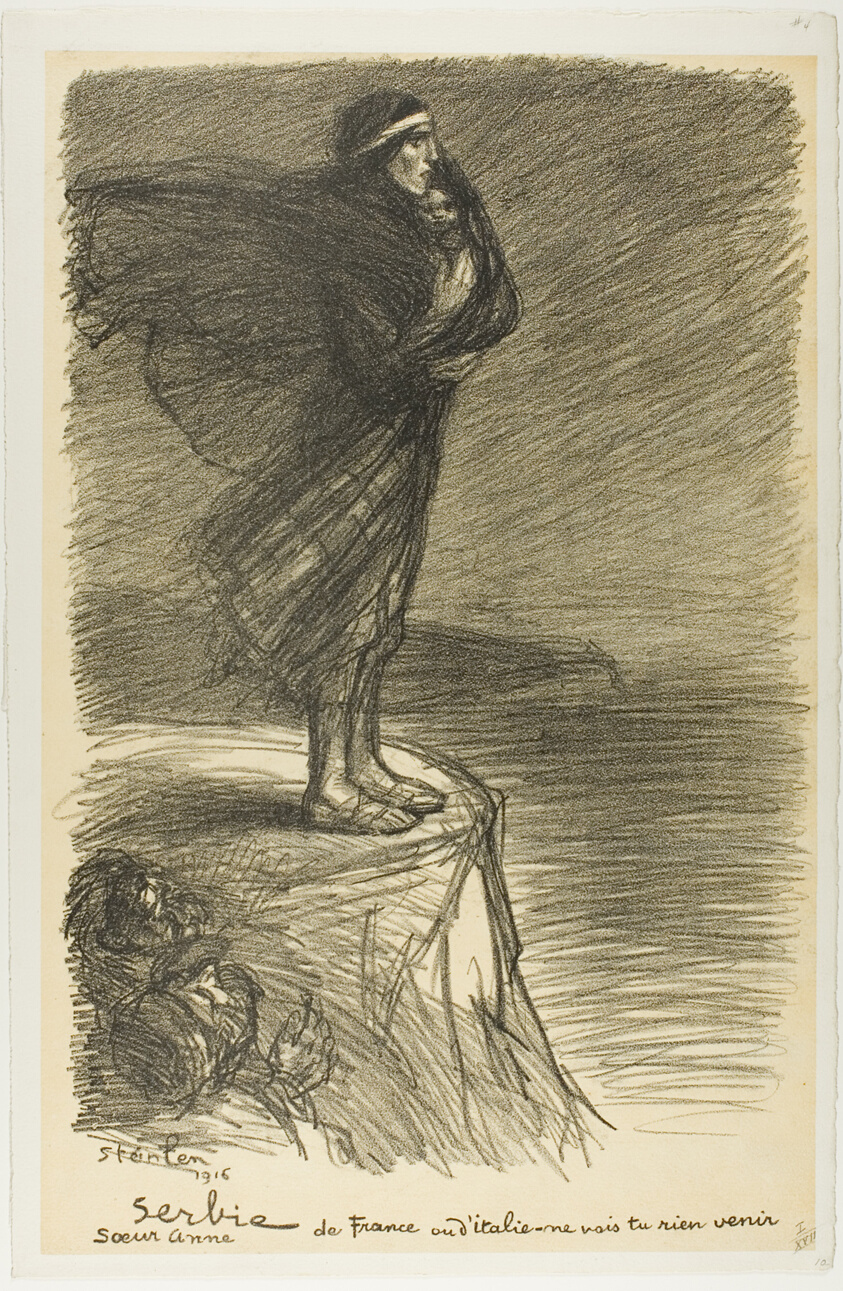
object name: Print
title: Serbia: Sister Anne, plate twenty from Actualités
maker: Théophile-Alexandre Steinlen; French, born Switzerland, 1859-1923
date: published January 1916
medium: Lithograph in black over fawn tint on thick off-white wove paper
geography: France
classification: lithograph; print; prints and drawing